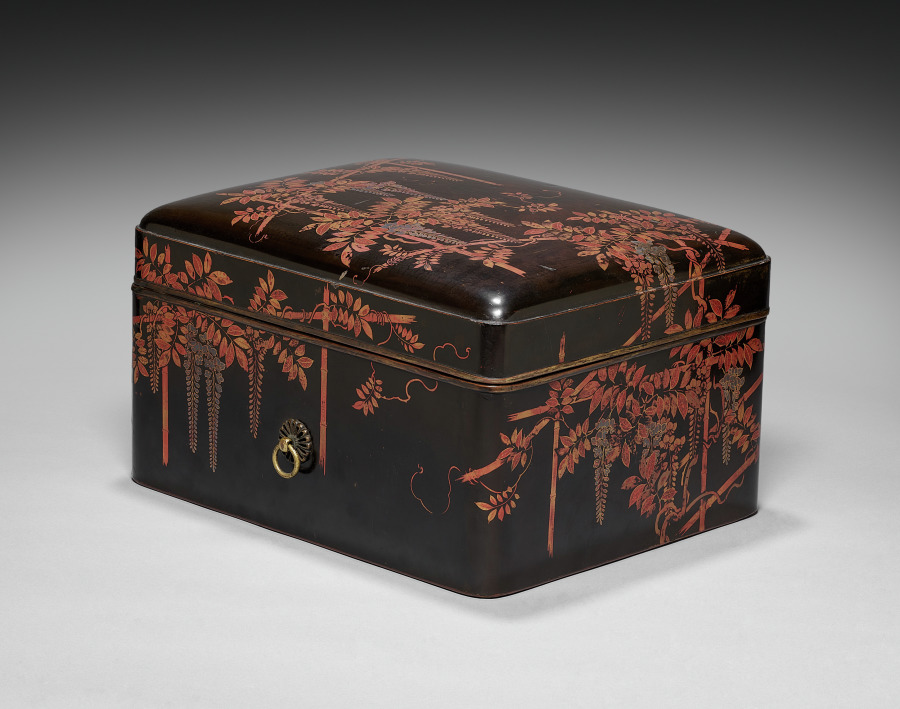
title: Cosmetic Box with Lid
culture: Japan, Momoyama period (1573–1615)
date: 1573–1615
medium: wood with lacquer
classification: Lacquer